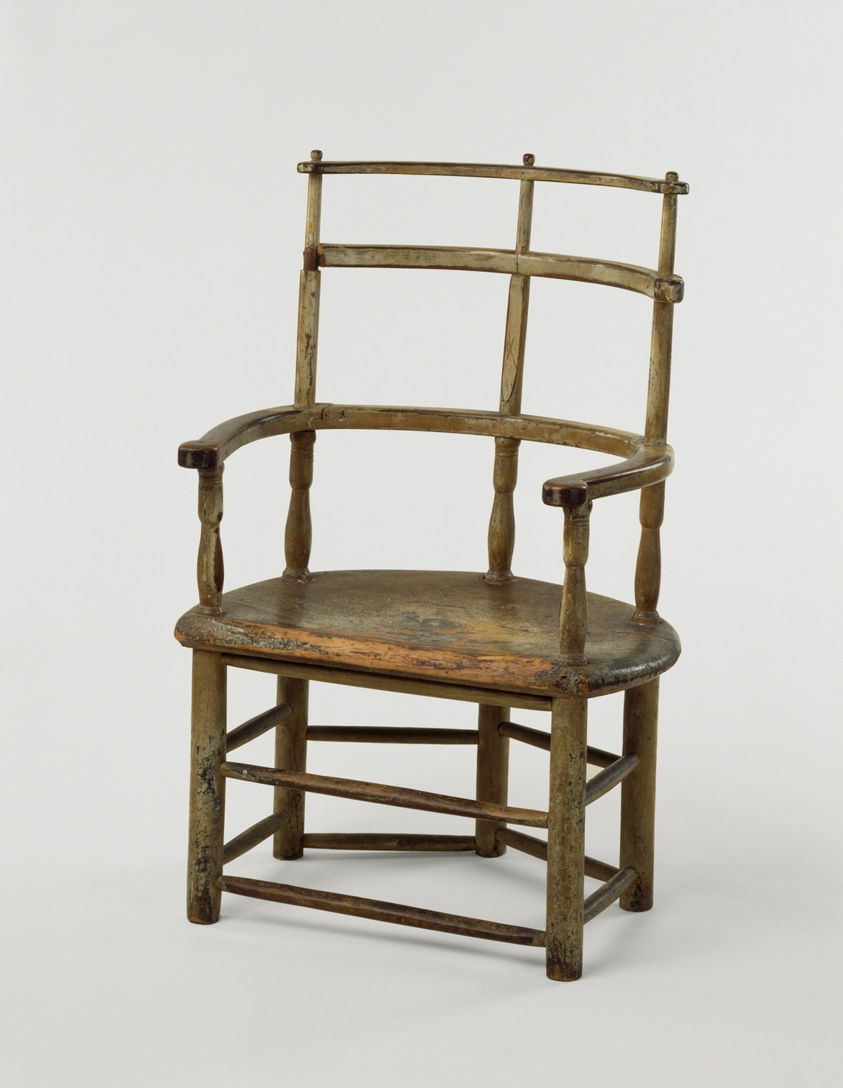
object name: Furniture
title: Windsor Armchair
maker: Artist unknown (American, 18th–19th century)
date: 1785–1820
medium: Maple and pine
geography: United States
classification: seating; furniture; american decorative arts; american arts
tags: furniture